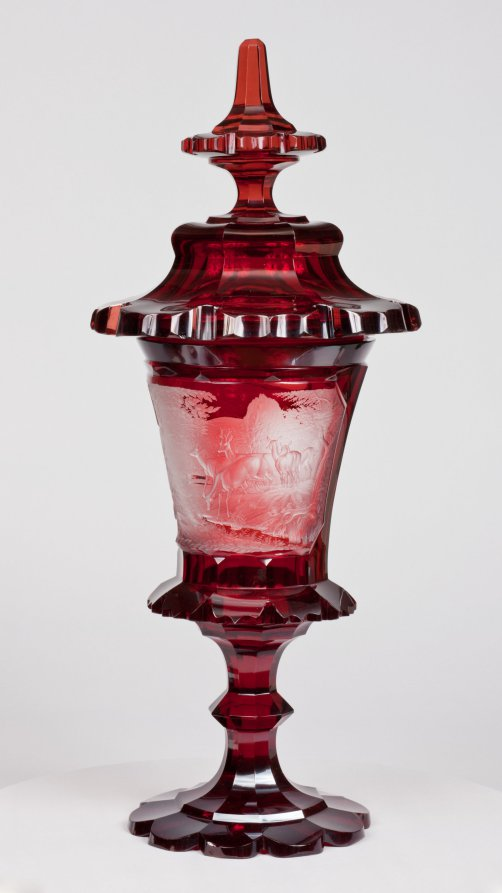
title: Covered Cup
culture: Bohemia, 19th century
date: mid-1800s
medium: ruby glass with engraved decoration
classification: Glass